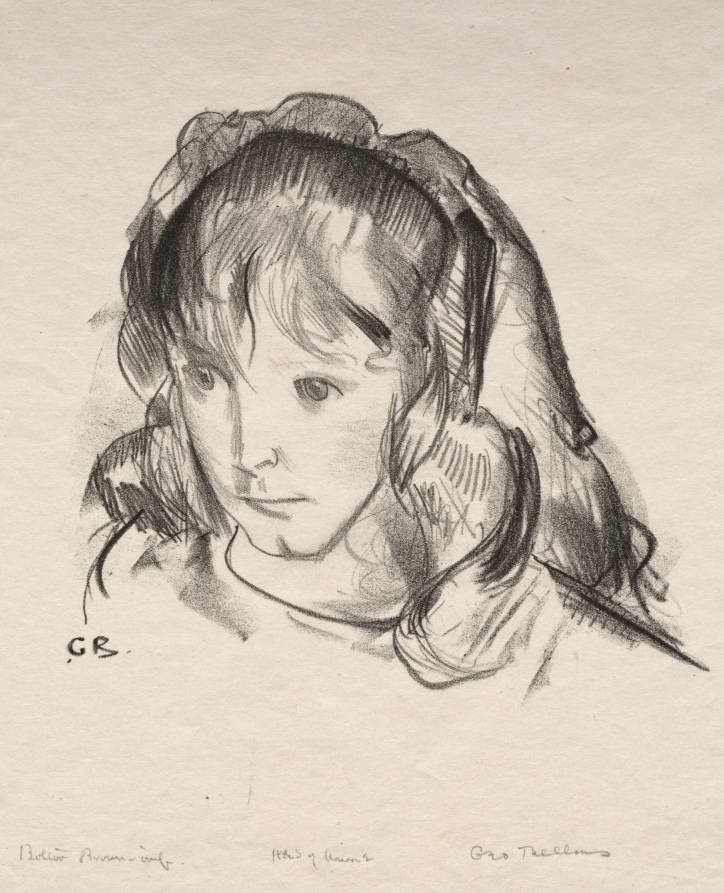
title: Head of Anne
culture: America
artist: George Bellows (American, 1882–1925)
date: 1922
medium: lithograph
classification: Print